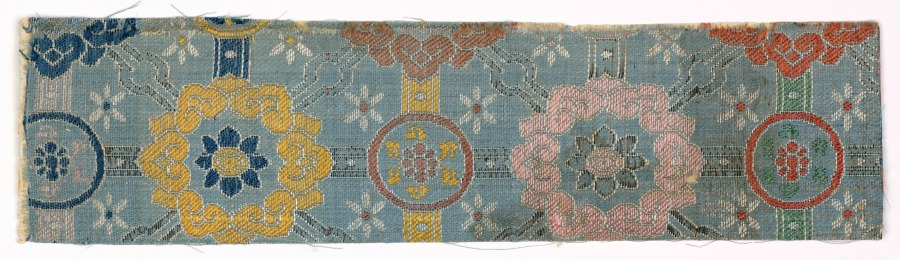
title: Textile Fragment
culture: Japan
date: 1800s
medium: silk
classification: Textile